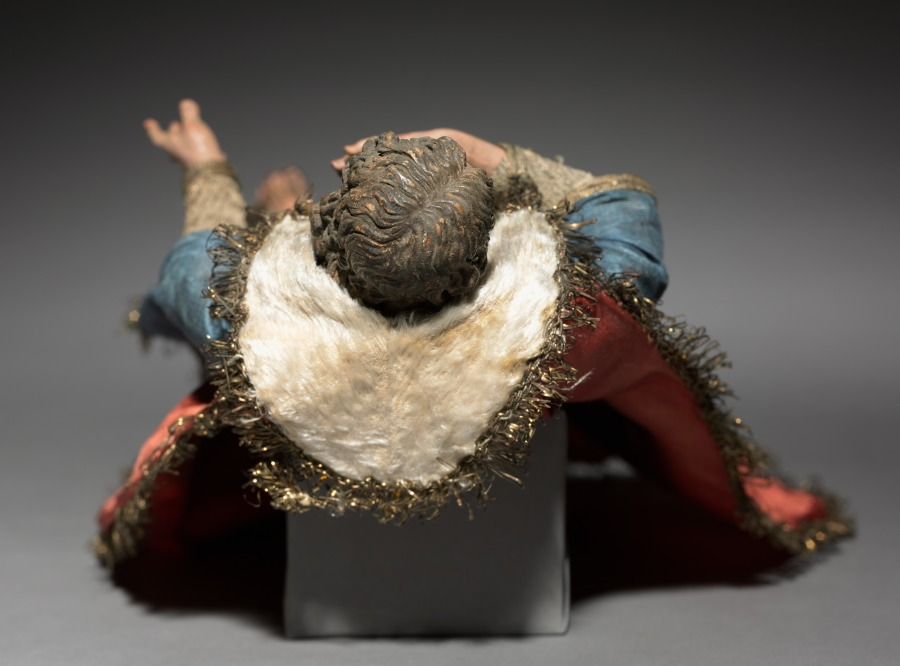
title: Figure from a Crèche: Magus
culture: Italy, Naples, late 18th-early 19th century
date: 1780–1830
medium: painted wood and terracotta with various textiles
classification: Sculpture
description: The practice of creating scenes of the Nativity for the home dates from the early 1700s in Italy, where people began to set up doll-like figures of about a foot or less in height. The custom was particularly popular in Naples around 1800, where crèche scenes (crèche means cradle, or crib) included many figures, whose heads and hands of painted terracotta, stuffed cloth bodies, and clothing adapted from contemporary local costumes gave them an amazingly realistic character. Representations of the birth of Jesus can be traced to the first few centuries of Christianity. Both living creatures and sculptural depictions of them were used from early times. By the late middle ages it was customary to create life-size figures of wood or stone, naturalistically painted, to represent the characters who participated in the events of Jesus's early life. These sculptures were then arranged in scenes illustrating one or both of the most important of these events, the Adoration of the Shepherds and the Adoration of the Magi-the three kings from the East who came to pay homage to the Christ child. Used in churches, these large figures were especially popular in Italy, Central Europe, Spain, and Portugal. This Object in Focus presentation was organized by Henry Hawley, Curator of Renaissance and Later Decorative Arts and Sculpture.